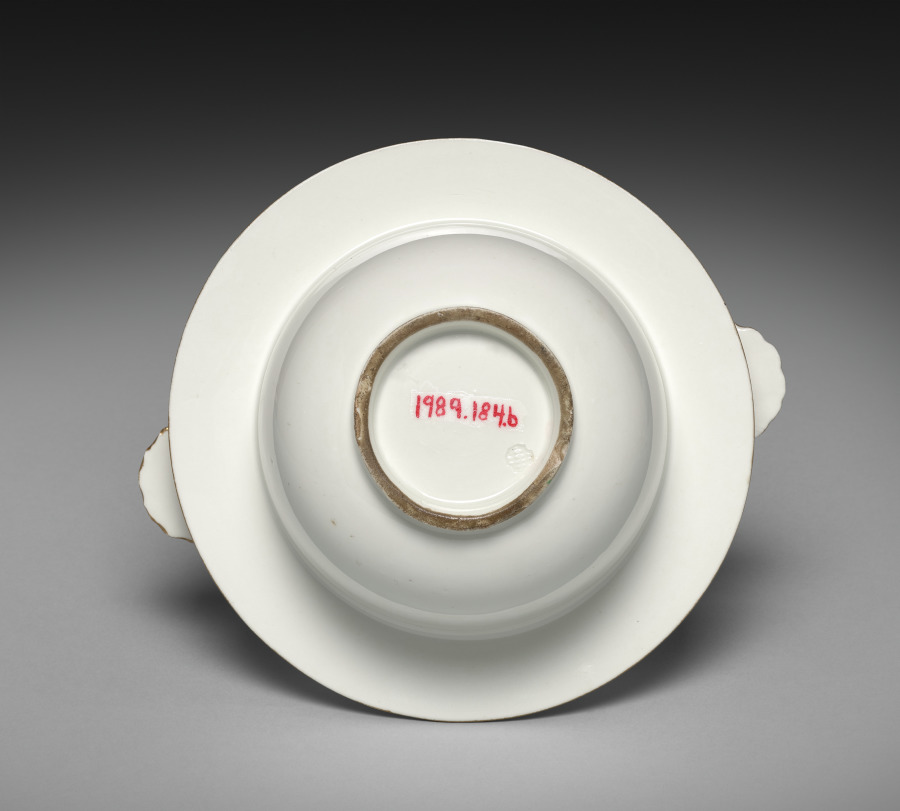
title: Food Warmer (Veilleuse) [Food Container]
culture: Germany, Nymphenburg, 18th century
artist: Meissen Porcelain Factory (German, est. c. 1710)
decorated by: probably by Georg Christoph Lindemann (German)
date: c. 1758– 1760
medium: porcelain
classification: Ceramic